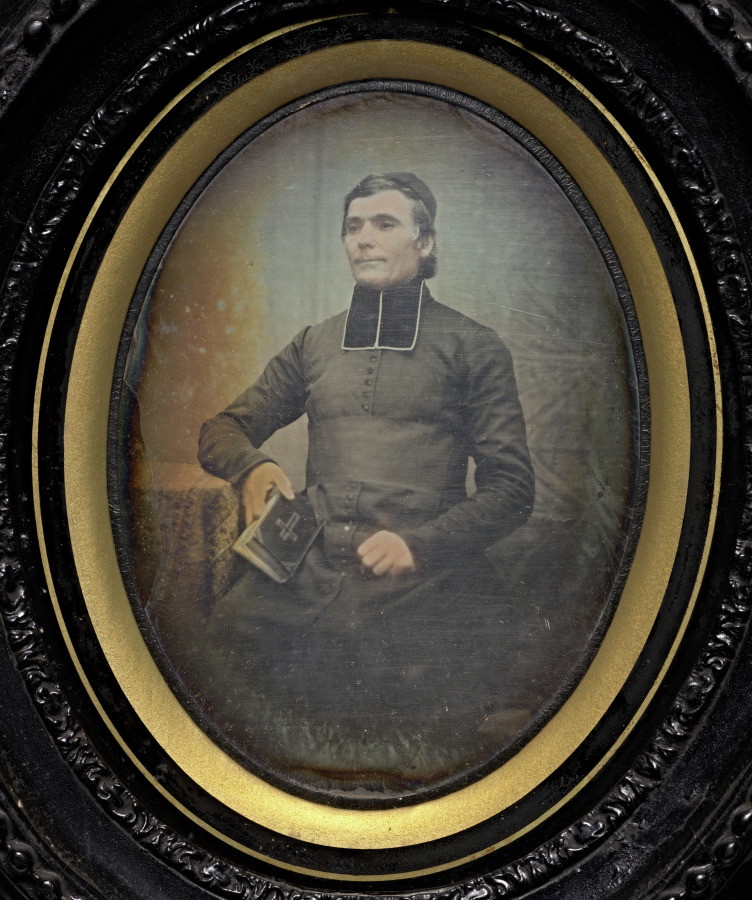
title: Priest, France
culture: France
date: c. 1840s–50s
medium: daguerreotype, half-plate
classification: Photograph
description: The daguerreotype was the first publicly available photographicprocess.Itwasinusefrom1839into the 1850s and especially favored for portraits. The daguerreotype’s mirrorlike surface offered incredible clarity and detail but the process only produced a unique image. It did not allow multiple copies to be produced.